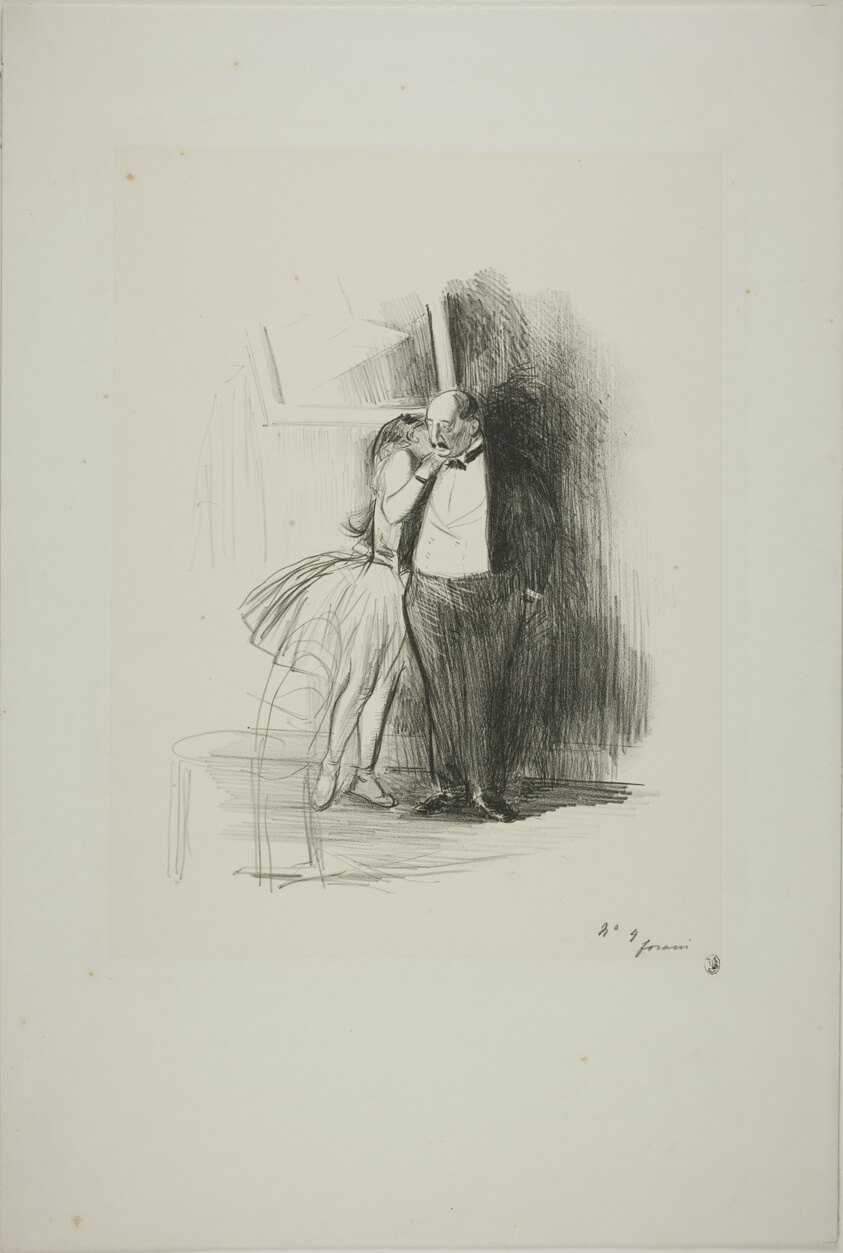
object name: Print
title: The Consent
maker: Jean Louis Forain (French, 1852-1931)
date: 1892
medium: Lithograph on ivory China paper laid down on white wove paper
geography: France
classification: lithograph; print; prints and drawing